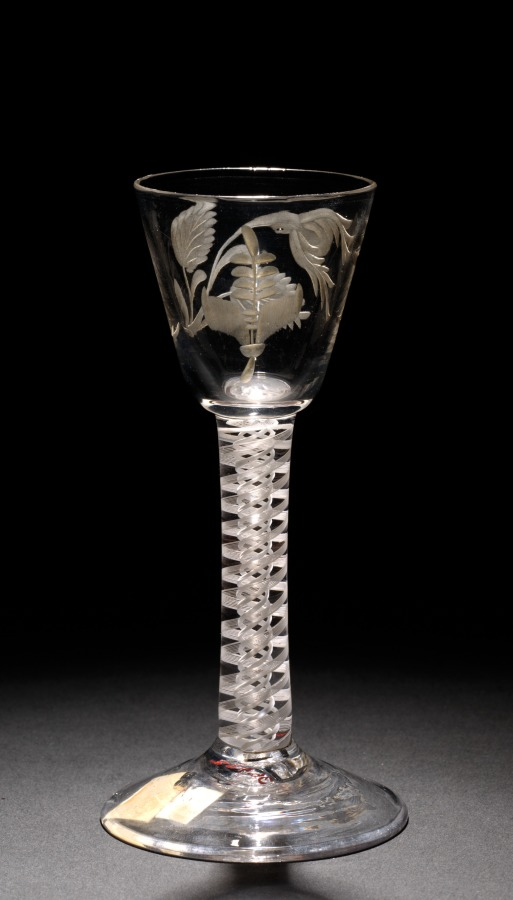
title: Wine Glass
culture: England, 18th century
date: 1750–1799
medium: glass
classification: Glass